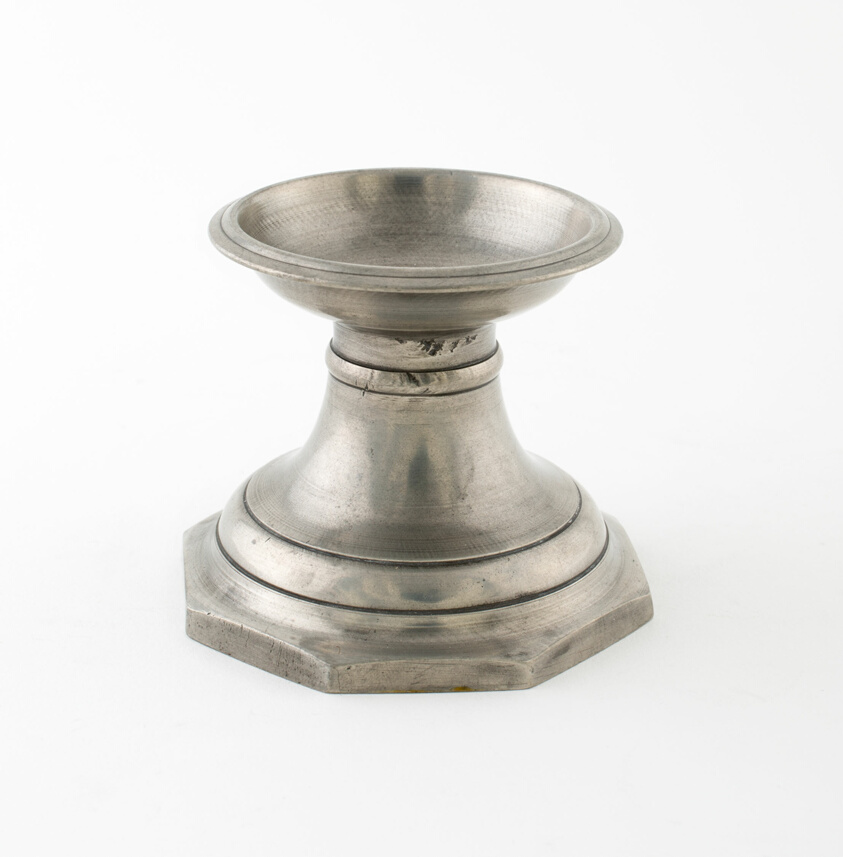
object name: Metalwork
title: Footed Salt Cellar with Octogonal Base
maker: Louis Alegre (French, active 1805-1830); Angers, France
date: c. 1830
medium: Pewter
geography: Angers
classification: pewter; metalwork; european decorative arts